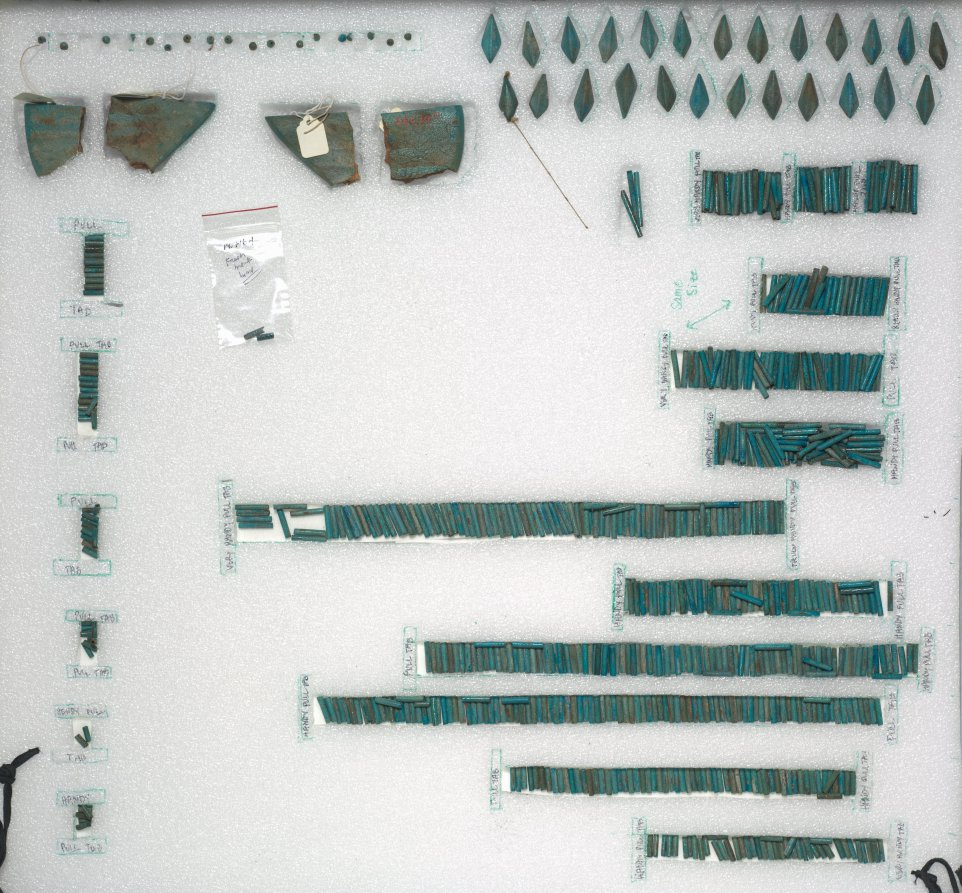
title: Jewelry of Senbi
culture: Egypt, Middle Kingdom (2040–1648 BCE)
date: 1980–1801 BCE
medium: blue-to-turquoise faience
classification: Jewelry